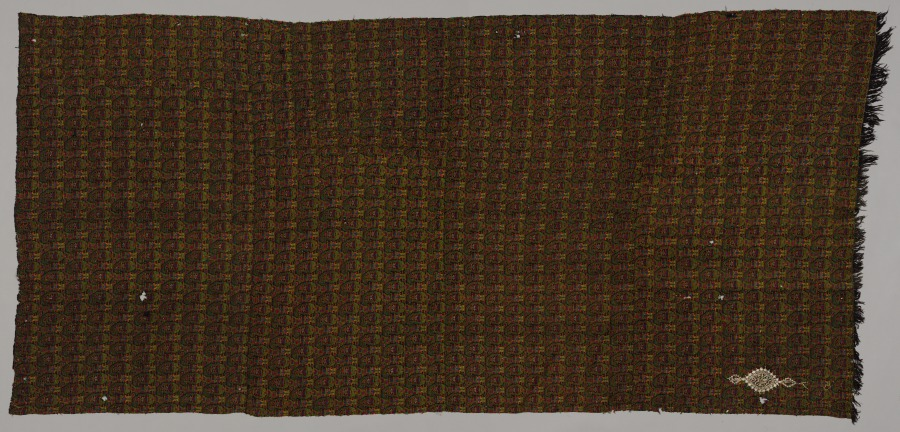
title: Shawl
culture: India, Punjab, late 19th century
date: late 1800s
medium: tapestry twill; wool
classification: Textile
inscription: Arabic inscription in left corner; may give name and/or date.